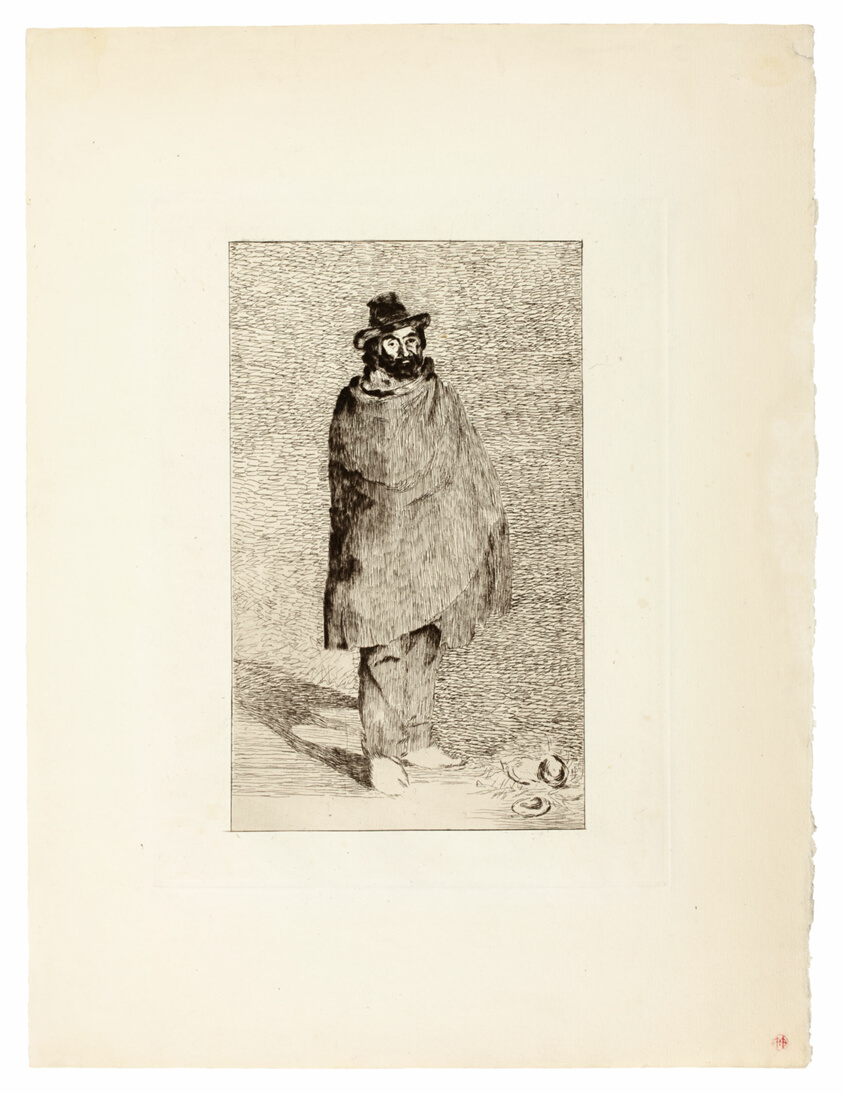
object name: Print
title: The Philosopher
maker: Édouard Manet (French, 1832-1883)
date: 1865–66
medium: Etching and drypoint in warm black on ivory laid paper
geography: France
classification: etching; print; prints and drawing